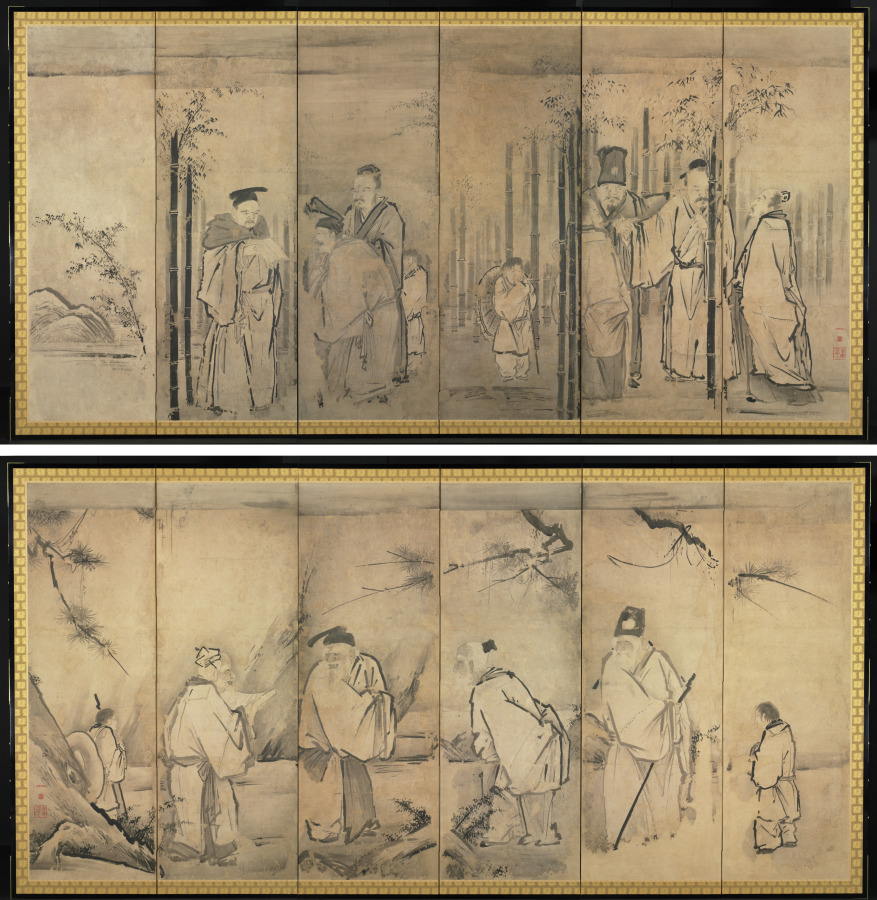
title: Seven Sages of the Bamboo Grove; Four Elders of Mt. Shang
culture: Japan, Edo period (1615–1868)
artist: Kano Tan’yū (Japanese, 1602–1674)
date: 1600s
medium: pair of six-fold screens; ink on paper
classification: Painting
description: The Kano school was a group of professional artists patronized by the shogun from the late Muromachi period to the Edo period. The group adopted themes of reclusiveness to convey the importance of loyalty to the shogunate. A leader of the Edo Kano school, Kano Tanyu paired Seven Sages of the Bamboo Grove and Four Elders of Mt. Shang to reference a painting of the same theme attributed to Kano Motonobu. Seven Sages of the Bamboo Grove refers to the elites who escaped the social chaos of China’s Wei-Jin period (AD 200s–400s); they fled to a secluded bamboo grove where they could express themselves freely, enjoying pure conversation, music, and wine. Four Elders of Mt. Shang depicts the scholars who left the turbulence of the late Qin dynasty to pursue their scholarly interests in seclusion on Mt. Shang in Shanxi province.